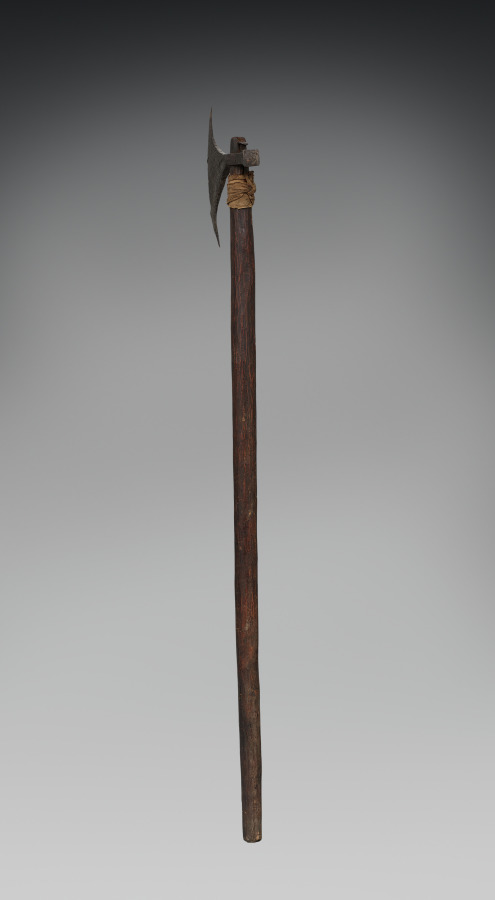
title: Axe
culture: Philippines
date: Before 1922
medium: Blade: metal; handle: wood and natural fibers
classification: Arms and Armor